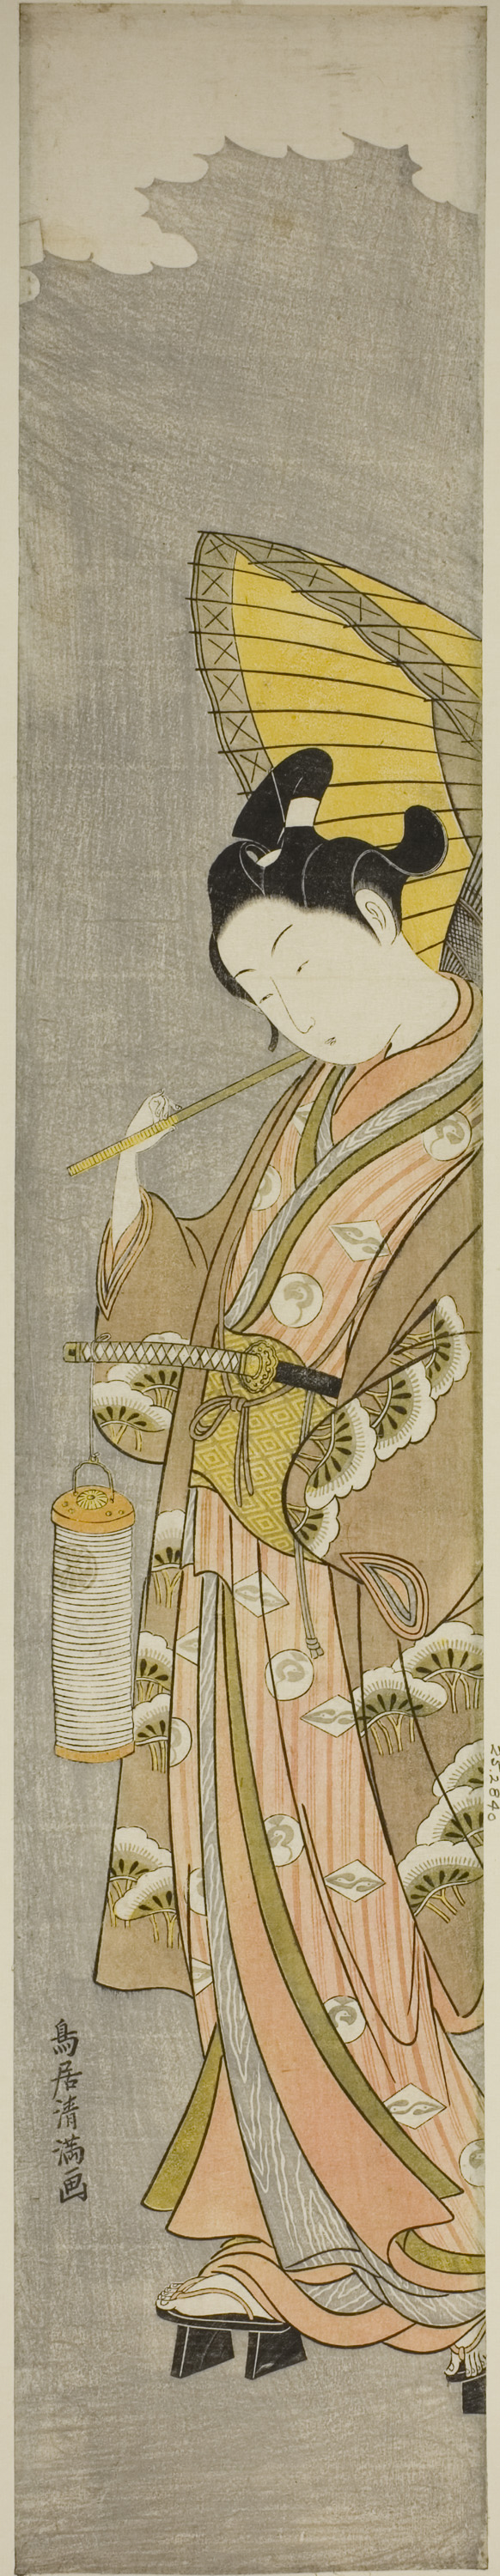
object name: Print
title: Young man holding umbrella and lantern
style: Japanese (culture or style)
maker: Torii Kiyomitsu I (Japanese, 1735-1785)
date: c. 1769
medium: Color woodblock print; hashira-e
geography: Japan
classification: woodblock print; print; asian art